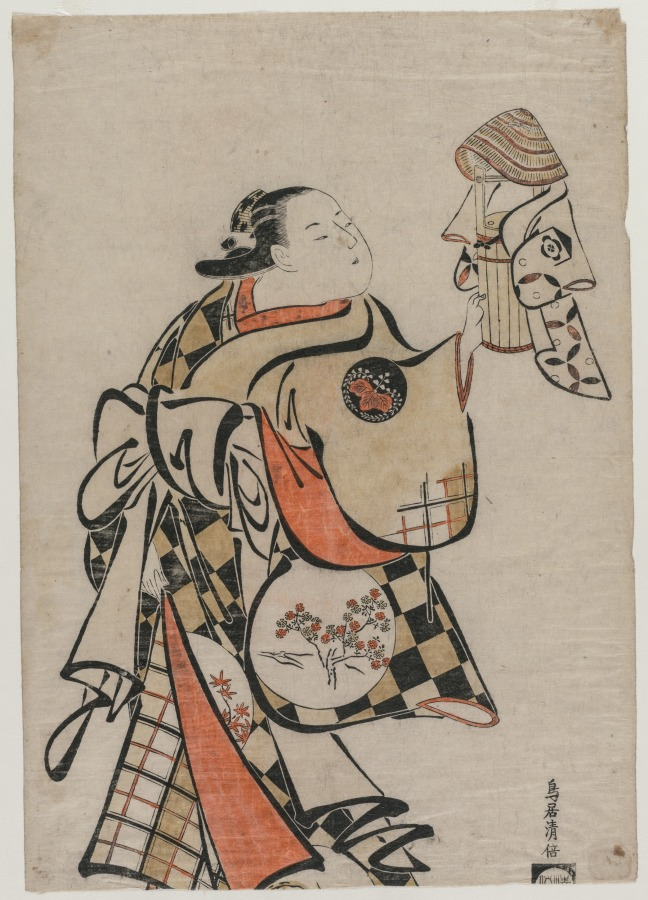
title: Fujimura Handayu as a Courtesan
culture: Japan, Edo period (1615–1868)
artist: Torii Kiyomasu (Japanese)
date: mid 1710s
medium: hand-colored woodblock print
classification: Print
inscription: Signature: Torii Kiyomasu Artist Seal: Kiyomasu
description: In this theatrical scene, the actor Fujimura Handay holds a small wooden bucket in his hand. The bucket is "dressed" in a straw hat and a robe that is decorated with the crest of one of the Soga brothers, who were the subject of a popular Japanese tale of revenge.